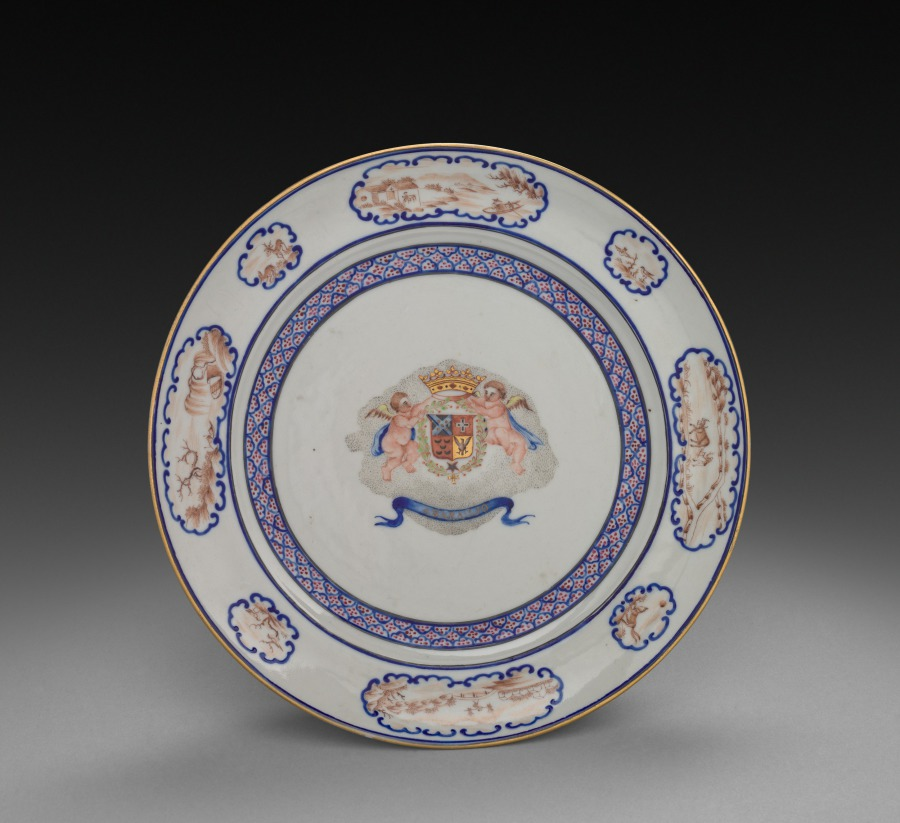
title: Plate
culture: China, Chinese Export, 18th century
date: 1785–1800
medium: porcelain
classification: Ceramic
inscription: "AD' ARAUJO DE ACEBEDO."